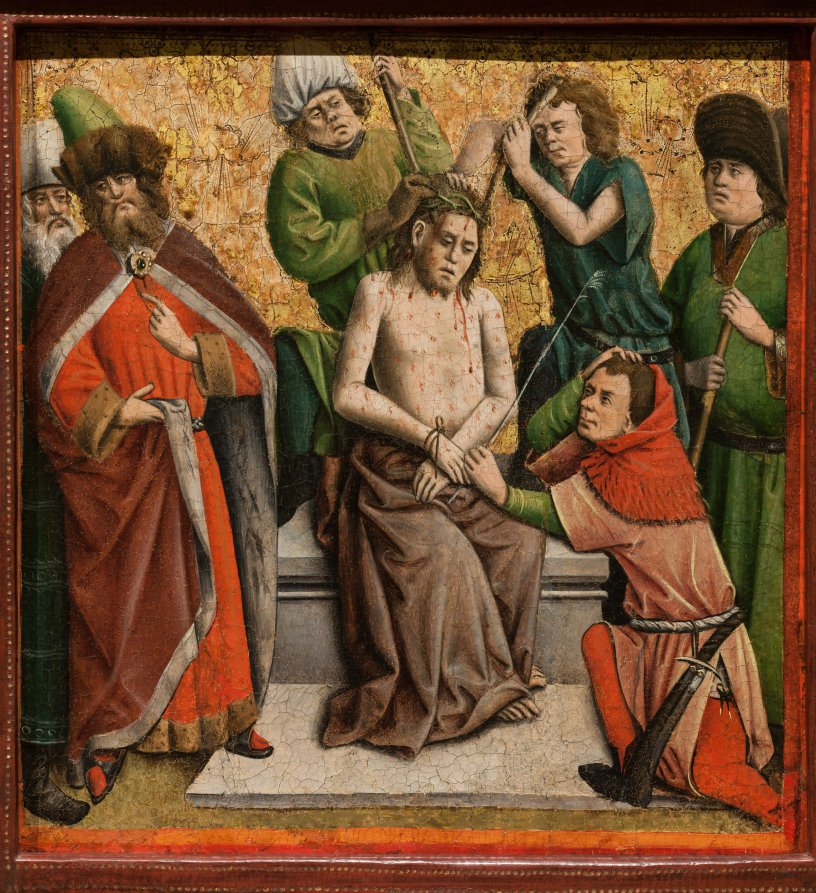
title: Altarpiece with The Passion of Christ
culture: Germany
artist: Master of the Schlägl Altarpiece (German)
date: c. 1440s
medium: oil and gold on wood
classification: Painting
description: The visual focus of this altarpiece is the suffering and death of Christ on the cross. So-called Passion cycles in art include the events leading up to and following the Crucifixion, not only as single subjects but as scenes meant to be read in sequence. Passion cycles were promoted by the two great teaching orders, the Franciscans and the Dominicans, for whom this subject represented the main religious drama of their churches, and also by the German mystics who advocated private contemplation on the humanity and suffering of Christ. The original context for this altarpiece remains unknown, but it was probably made for a religious institution in Westphalia in the Rhine Valley. During the 1870s it was given to the Abbey of Schlägl, near Linz in Upper Austria, from which both altarpiece and artist take their names. The altarpiece is not preserved today in its original format, and some of the individual scenes are missing. Scholars continue to debate the original number of scenes and their sequencing; nine of the original panels have survived, four are shown here.